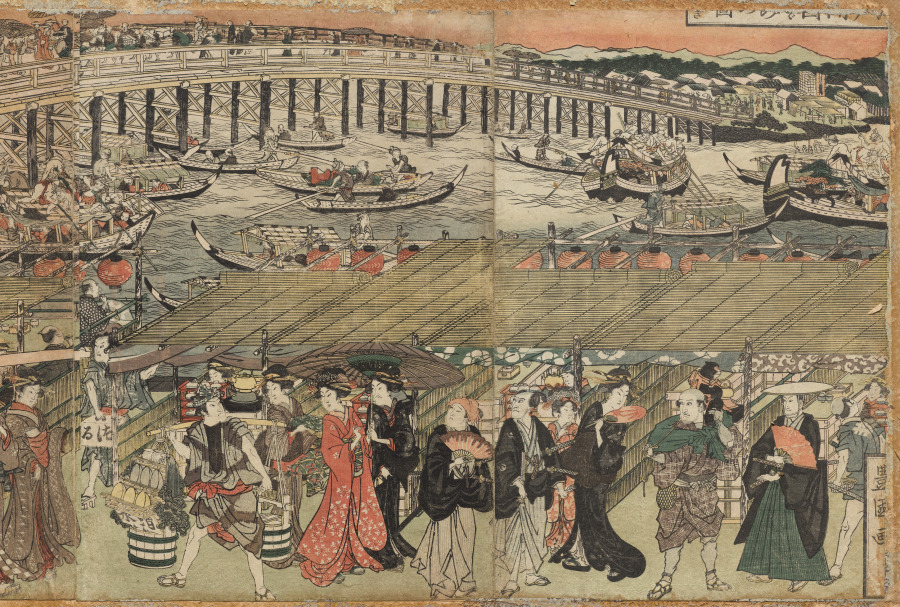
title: Cooling Off at Ryōgoku Bridge in Edo, a Pentaptych (Edo Ryôgoku suzumi no zu, gomai tsuzuki)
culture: Japan, Edo period (1615–1868)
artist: Utagawa Toyokuni (Japanese, 1769–1825)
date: 1811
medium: Pentaptych of color woodblock prints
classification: Print